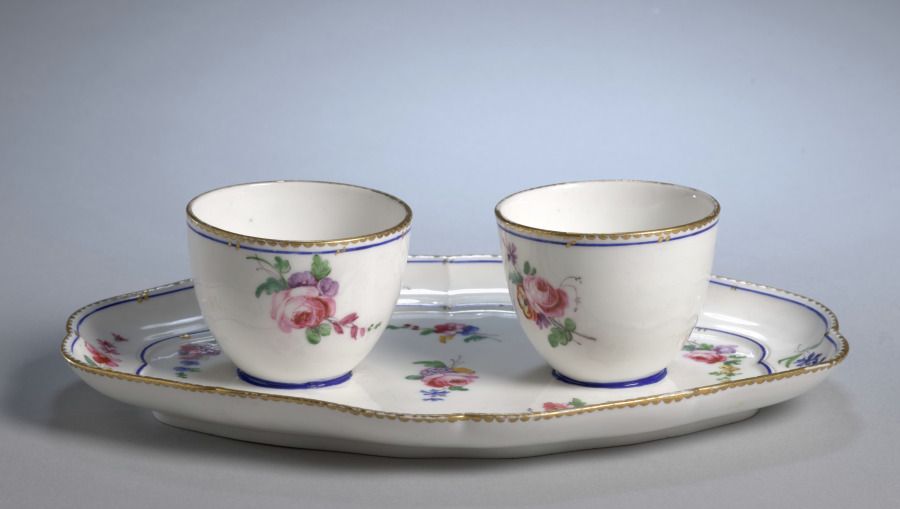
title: Jam Pots on Stand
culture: France, 18th century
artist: Sèvres Porcelain Factory (French, est. 1756)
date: c. 1760's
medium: porcelain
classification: Ceramic